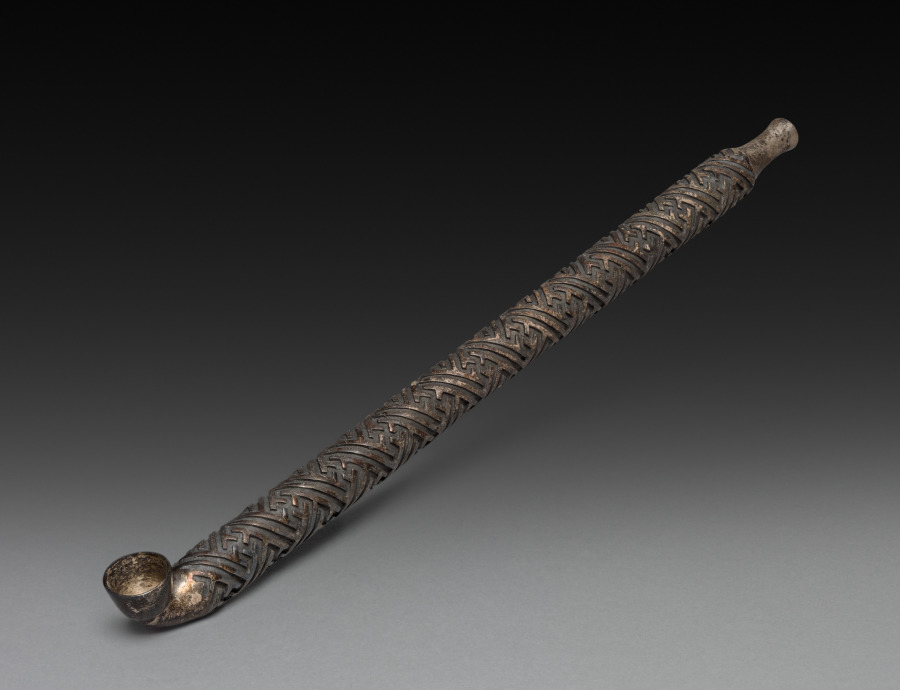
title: Tobacco Pipe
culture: Japan, Edo period (1615–1868)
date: 1700s to mid-1800s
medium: silver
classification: Miscellaneous